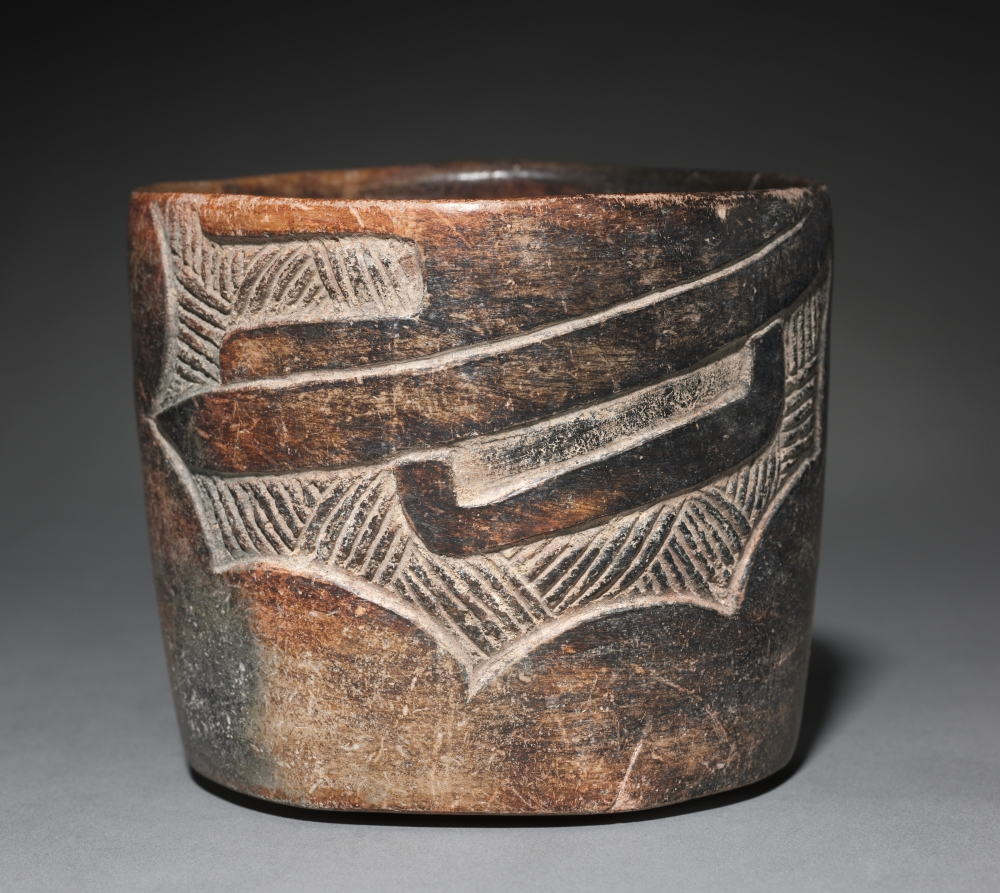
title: Carved Bowl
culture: Mexico, Central Highlands, Olmec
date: 1200–900 BCE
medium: earthenware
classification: Ceramic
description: Although the Olmec heartland is located on Mexico's Gulf Coast, sites with Olmec-style architecture and sculpture are also found in the highlands of Central Mexico. Small-scale Olmec works in jade and pottery are even more widely distributed; their ownership probably conferred great prestige.